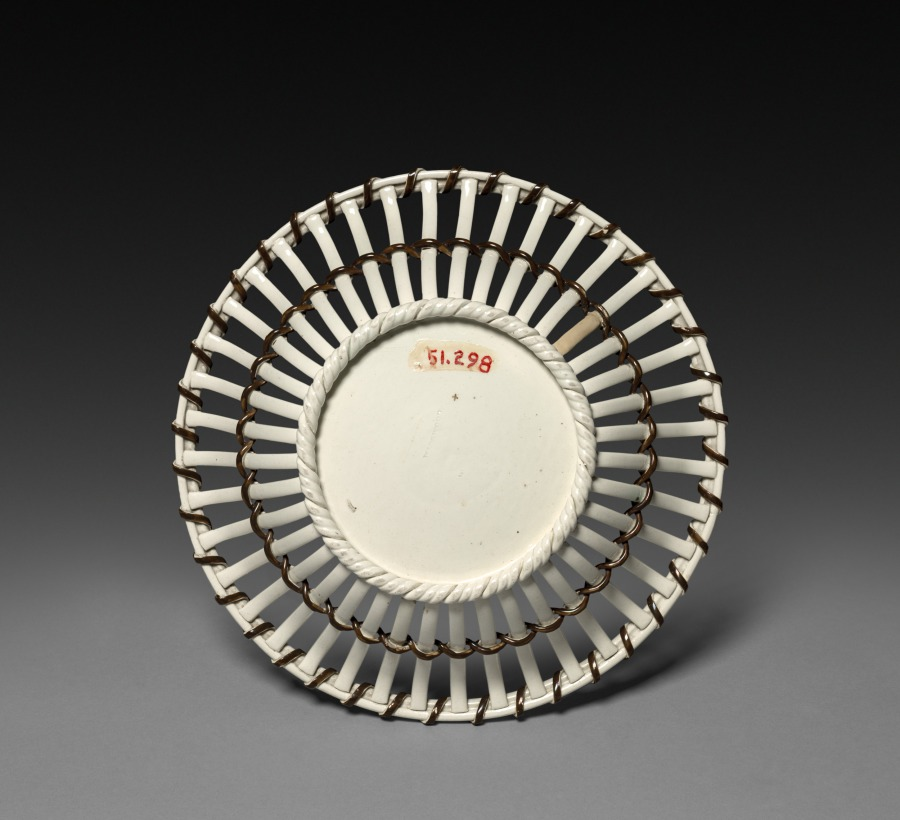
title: Bowl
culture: England, Staffordshire, 18th century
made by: Wedgwood Factory (British)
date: late 1700s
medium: cream-colored earthenware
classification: Ceramic